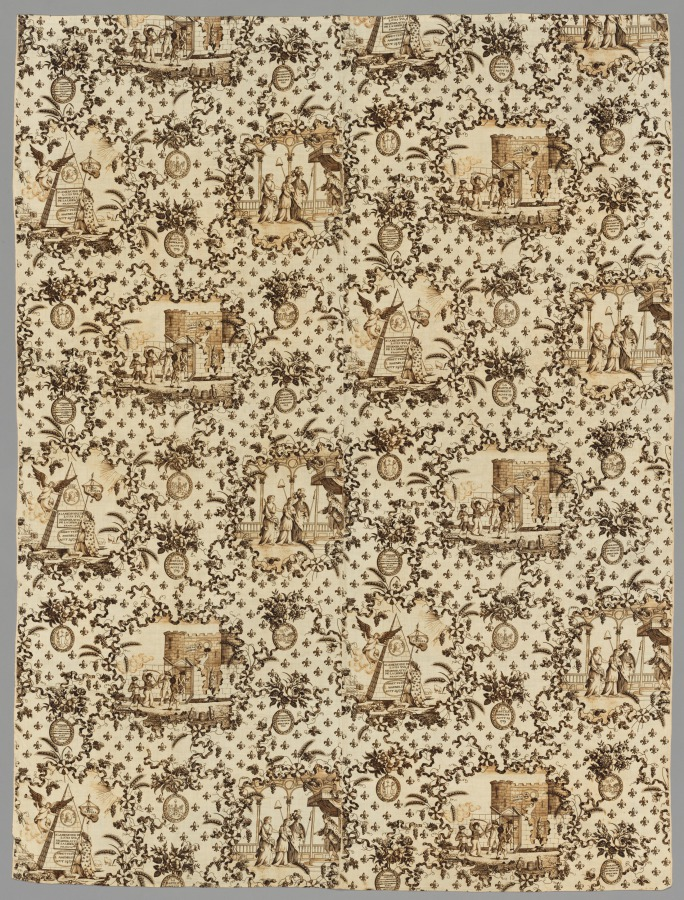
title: Copperplate Printed Linen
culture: England, 18th century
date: 1789–1791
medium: copperplate printed linen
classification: Textile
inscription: "Gordon sculp"; "F.E."; HM+Co"; "WS+S."